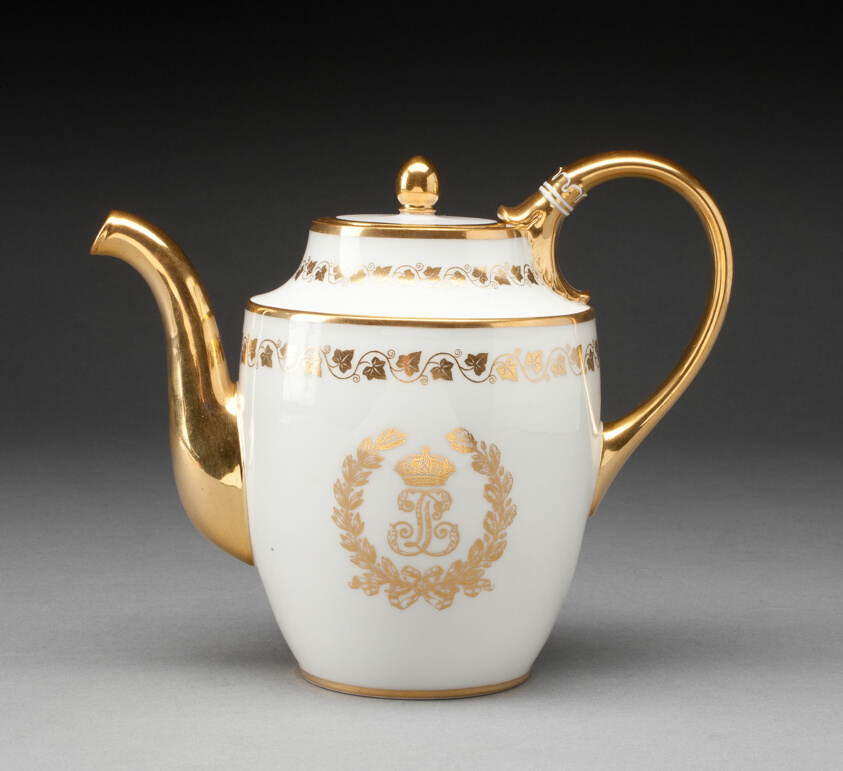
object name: Ceramics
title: Teapot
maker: Sèvres Porcelain Manufactory; French, founded 1740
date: 1845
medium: Hard-paste porcelain and gilding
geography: Sèvres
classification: teapot; teaware; porcelain; european decorative arts; ceramics